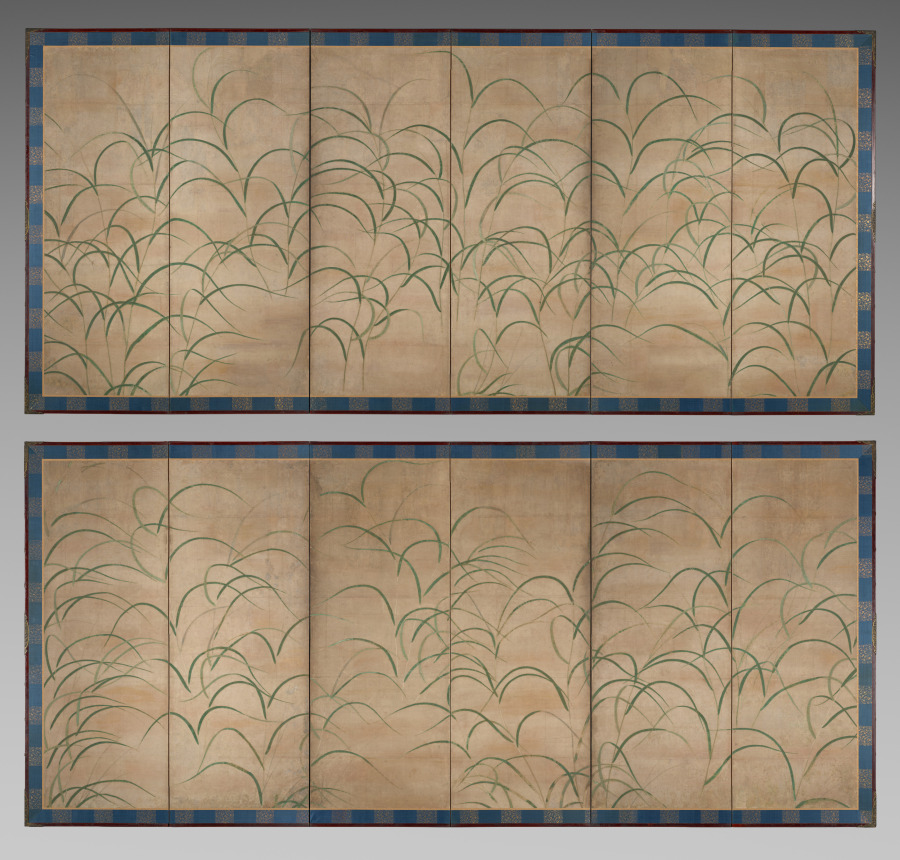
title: Susuki Grass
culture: Japan, Muromachi period (1392–1573)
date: c. 1525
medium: Pair of six-panel folding screens; ink, color, and gold on paper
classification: Painting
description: Susuki grass has a seasonal association with autumn in the Japanese visual and literary tradition. It is one of the “Seven Flowers of Autumn,” along with bush clover, arrowroot, pink, patrinia, mistflower, and bellflower. This composition immerses the beholder in a field of grasses and golden bands of mist. The design may have served as a backdrop for poems brushed in ink on decorated papers and attached to the surface of the screens, a practice with a long tradition in Japan.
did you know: The botanical name for susuki grass is miscanthus.